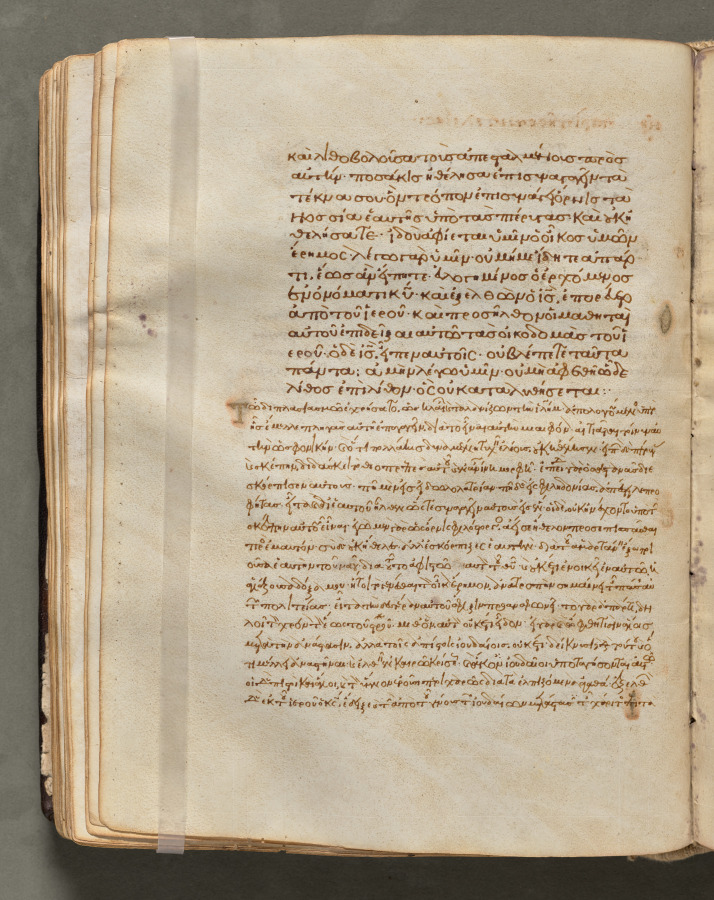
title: Text, folio 104 (verso), from a Gospel Book with Commentaries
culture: Byzantium, Constantinople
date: c. 1000–1100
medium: ink, tempera, and gold on vellum; leather binding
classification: Bound Volume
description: Each of the four gospels in this book opens on a page with brilliantly illuminated borders depicting the author of the text as well as birds-principally peacocks, symbols of the immortality of the soul-and fountains, representing the fountain of life and the salvation of the soul. This volume consists of 428 leaves with texts in Greek. Its level of sophistication suggests that it was probably written and decorated in a monastery in Constantinople.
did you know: Gospel Books were carried in procession through Byzantine churches.